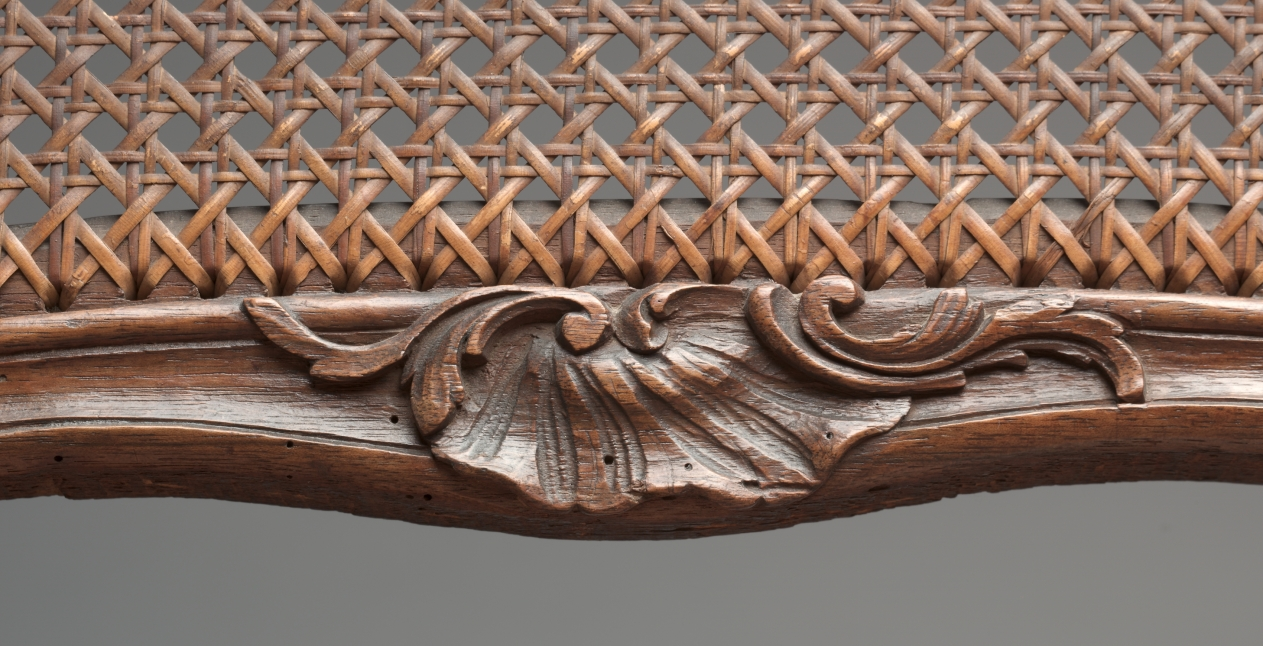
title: Armchair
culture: France, 18th century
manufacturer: René Cresson (French, c. 1705–c. 1749)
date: c.1740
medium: carved wood, cane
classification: Furniture and woodwork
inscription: signed underneath on strip across back: "CRESSON LAINE" (the trademark for René Cresson).